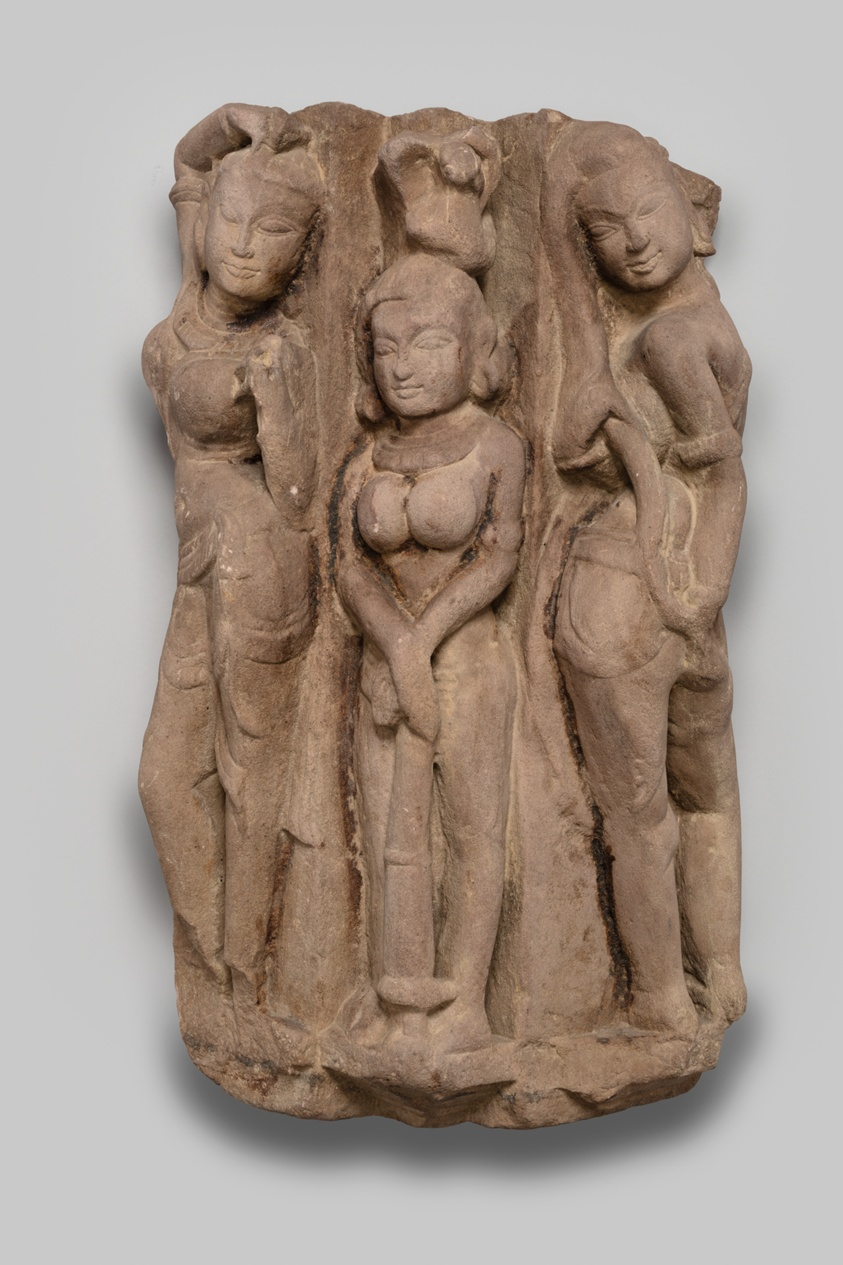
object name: Architectural fragment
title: Two Beautiful Women (Surasundari) Dressing with an Attendant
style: South Asian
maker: India; Madhya Pradesh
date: 10th/11th century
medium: Sandstone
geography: Madhya Pradesh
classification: stone (unidentified); stone; sculpture; asian art; architectural fragment